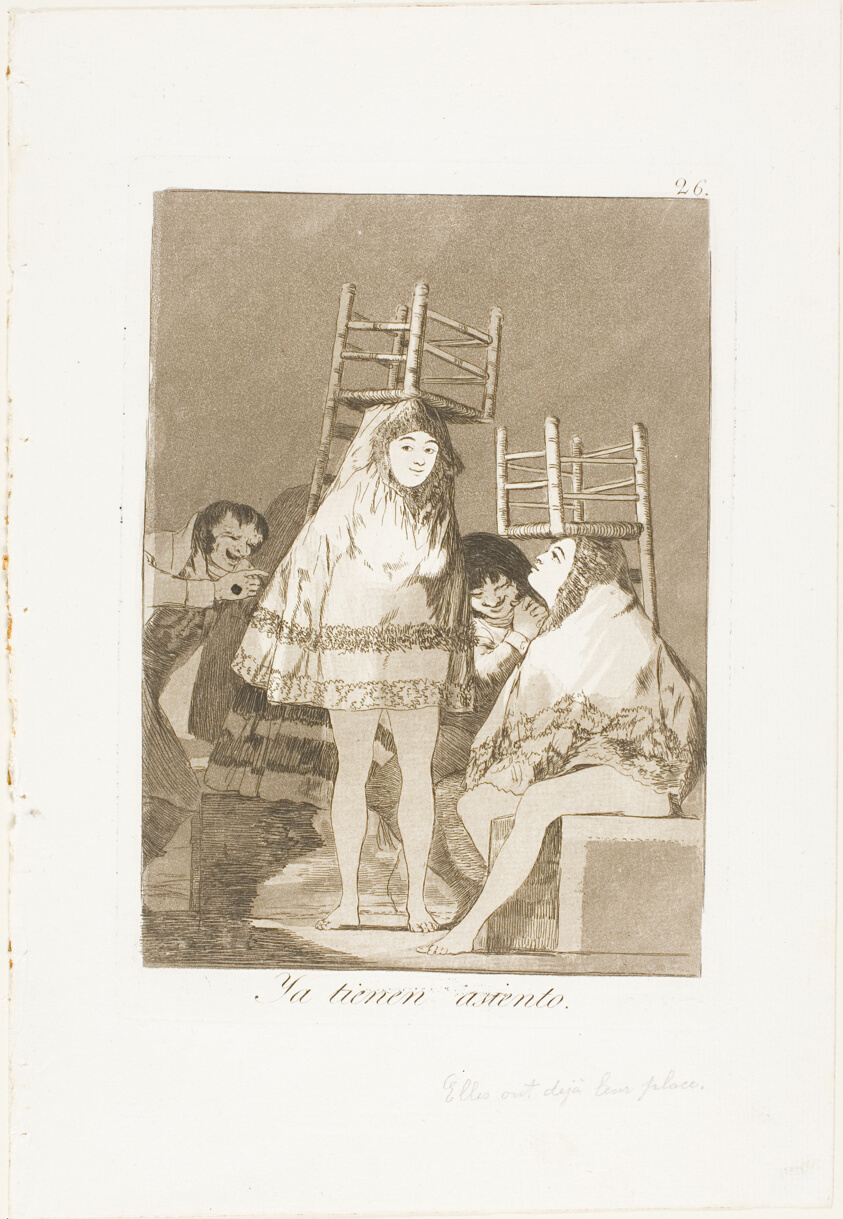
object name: Print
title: They've Already Got a Seat (i.e. bottom), plate 26 from Los Caprichos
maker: Francisco José de Goya y Lucientes (Spanish, 1746-1828)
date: 1797/99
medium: Etching and aquatint on ivory laid paper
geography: Spain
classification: etching; print; prints and drawing